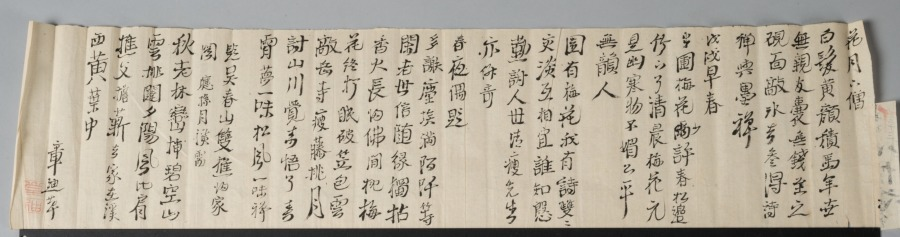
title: Happy Forest, from Water Margin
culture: Japan, Edo period (1615–1868)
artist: Matsumura Goshun (Japanese, 1752–1811)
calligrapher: and Amenomori Shōteki (Japanese, 1731–1786)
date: late 1700s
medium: hanging scroll; ink and color on paper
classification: Painting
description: The Chinese literary classic Water Margin is set in the 1120s and tells the story of 108 outlaws who first rebel against the government and then join forces with it. This painting depicts an episode in which hero Wu Song reclaims the tavern Happy Forest for its rightful owner, the prison warden’s son, Shi En. To prepare for the fight, Wu Song drinks a lot of wine. The painting was inscribed with a quote in which an ally describes Wu Song’s fighting style. It reads as follows: Where his twin fists rise, clouds and thunder roar, When his flying kick comes, wind and rain tremble.